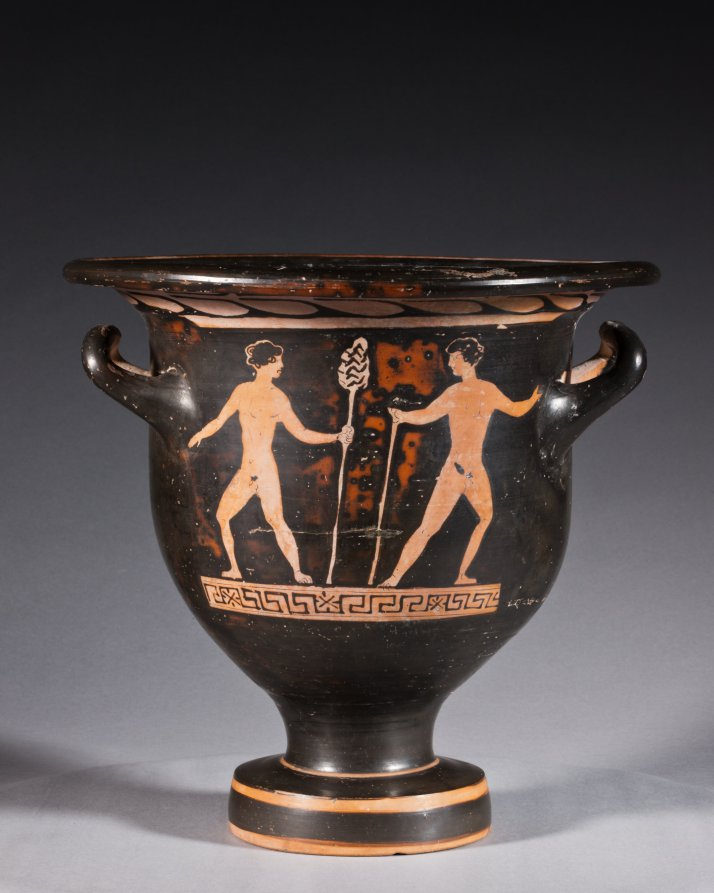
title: Red-Figure Bell Krater (Mixing Vessel): Aphrodite and Eros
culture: South Italian, Apulian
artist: attributed to Graz Painter (South Italian, Apulian, active c. 380–360 BCE)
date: c. 370–360 BCE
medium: ceramic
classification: Ceramic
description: This small mixing vessel shows a finely dressed woman seated on a chest and holding up a mirror to admire herself. Before her stands Eros, the winged god of love, holding a ribbon or sash. Behind the woman stands a pillar with the inscription ΑΦΡΟΔΙΤΗ, or APHRODITE, the goddess of love. Such labels are rare on vases, and scholars debate whether this names the woman shown as Aphrodite herself, with her son Eros, or a bride envisioning herself as Aphrodite, just before her wedding.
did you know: The dancing nude youths on the reverse are unusual; typically they would be standing and draped.